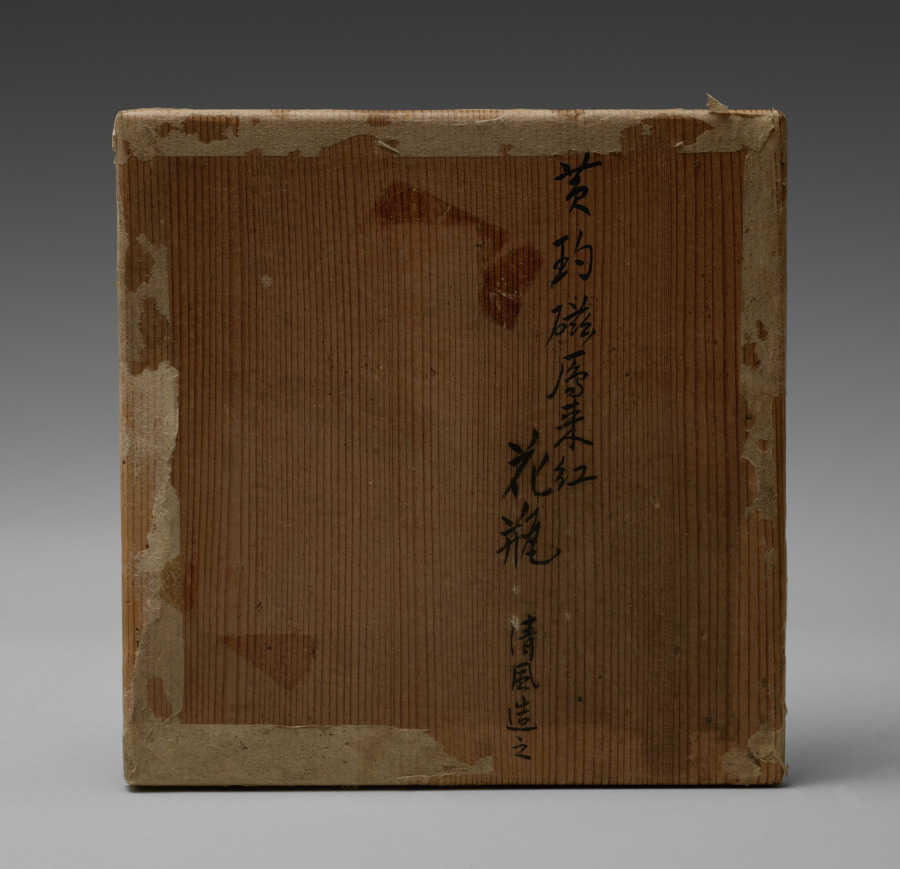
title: Prunus Vase with Amaranth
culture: Japan, Taishō period (1912–26)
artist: Seifū Yohei IV (Japanese, 1872–1951)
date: 1914–46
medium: Porcelain with yellow glaze and overglaze color enamel and gold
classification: Ceramic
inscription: 清風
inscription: 渡邊所藏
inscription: 清風造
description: Yohei IV’s interest in bold, colorful designs is on full display in this vase shaped like a “prunus vase,” or meiping (Japanese meipin). It has two colors of amaranthus on a yellow ground. It follows a design appearing on a sleeve-shaped vase by Yohei III. Yohei IV uses bright spring-green dots of overglaze enamel to suggest a ground plane in his yellow environment; he also uses red and magenta accented with wild gold cascades of dots for two plants he places on opposite sides of the vase, one much larger than the other. In Yohei III’s version, the body of the vessel is white, and the foliage of one plant is red with carefully painted veins in gold, while another plant strategically positioned behind it has a deep rust color, again carefully detailed in gold. In a sense, Yohei IV has deconstructed his father’s logical, balanced design and re-presented it as an emotive, lightheartedly chaotic one that sates the appetite for instant gratification, much as his father’s creation rewards the pursuit of elegance.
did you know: Seifū Yohei IV continued to create works in the studio’s signature colors but also produced pieces with strong color and flare that were his interpretations of Qing dynasty (1644–1911) glazes.